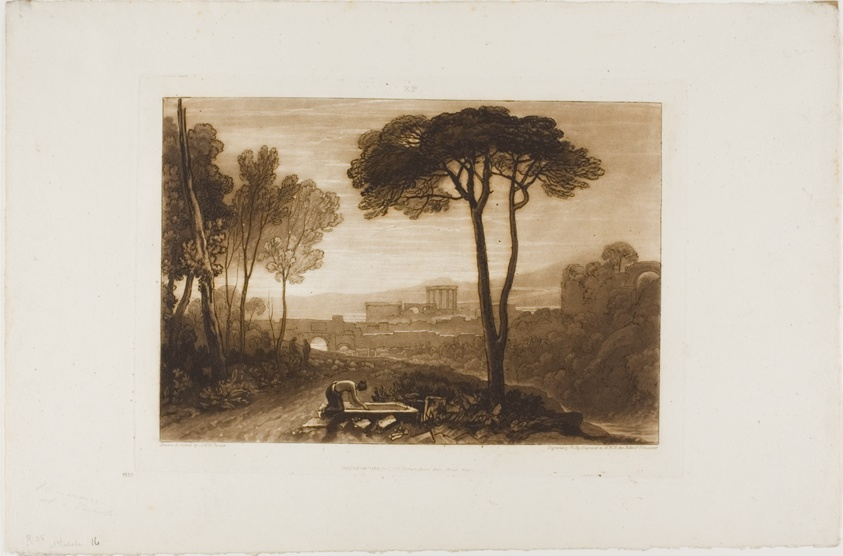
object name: Print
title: Scene in the Campagna, plate 38 from Liber Studiorum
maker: Joseph Mallord William Turner (English, 1775-1851); Engraved by William Say (English, 1768-1834)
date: Published February 1, 1812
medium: Etching and engraving in brown on ivory paper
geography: England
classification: etching; print; prints and drawing